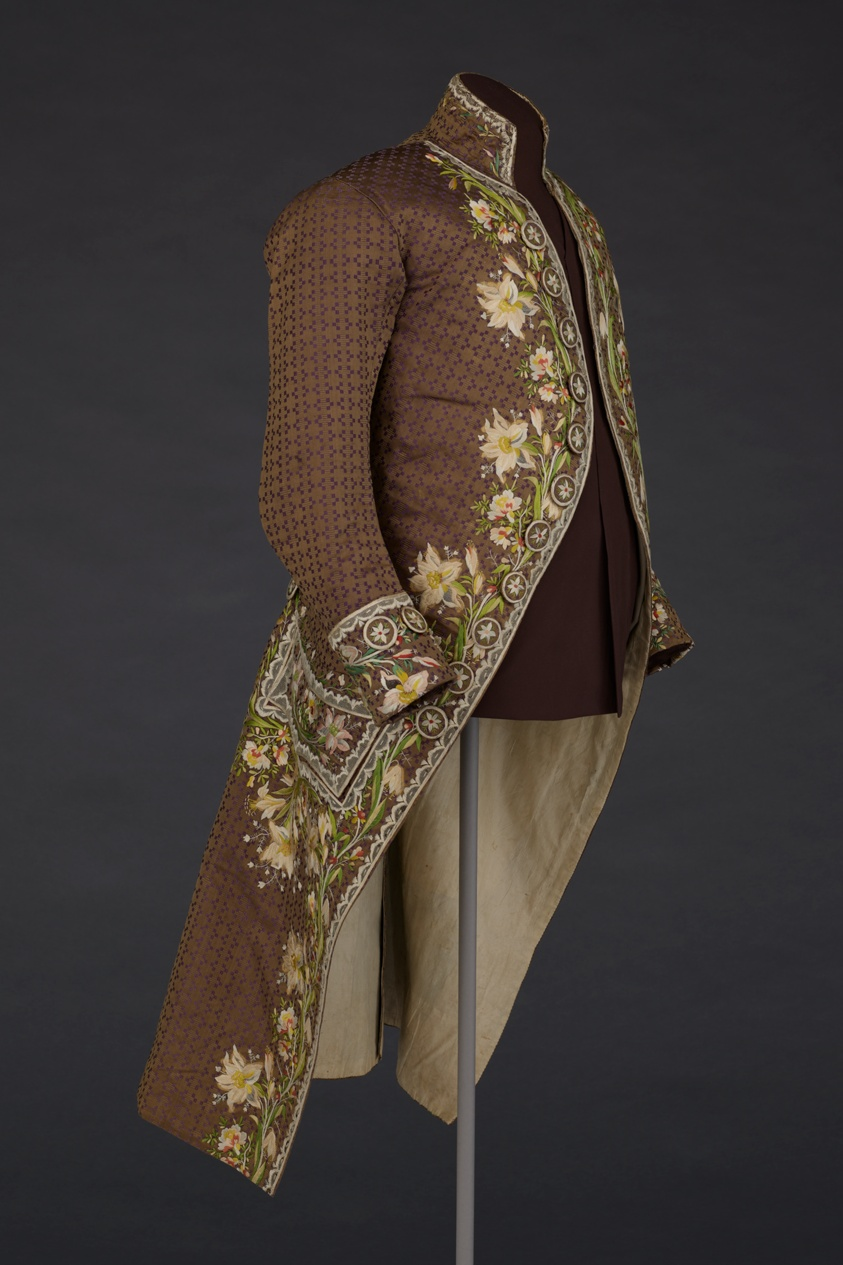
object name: Costume and Accessories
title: Man's Coat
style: 18th Century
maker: France, possibly Lyon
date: 1780s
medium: Silk, compound weave foundation; embroidered with silk threads in satin, stem and straight stitches; French knots, needle lace fillings, and slanted satin border block shading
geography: France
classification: textile; needlework (visual works); costume; dress (garment); clothing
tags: fashion, floral motifs, flowers